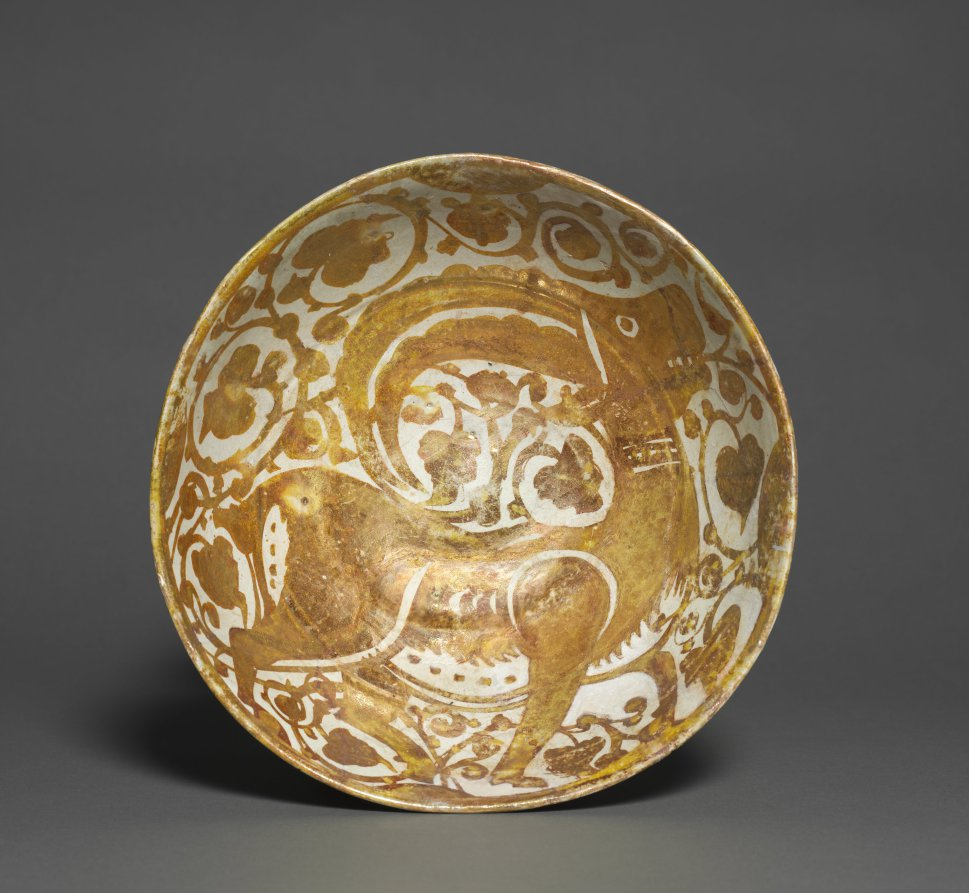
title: Luster Bowl with Ibex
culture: Egypt, Fustat (Old Cairo), Fatimid period (909–1171)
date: 1000s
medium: earthenware with luster-painted design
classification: Ceramic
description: The expensive and unpredictable luster technique was transmitted by Iraqi potters to the more prosperous Fatimid court in Cairo where it flourished from around 1000 until about 1171.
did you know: Lusterware seems to have been a secret process, confined to a small number of craftsmen.